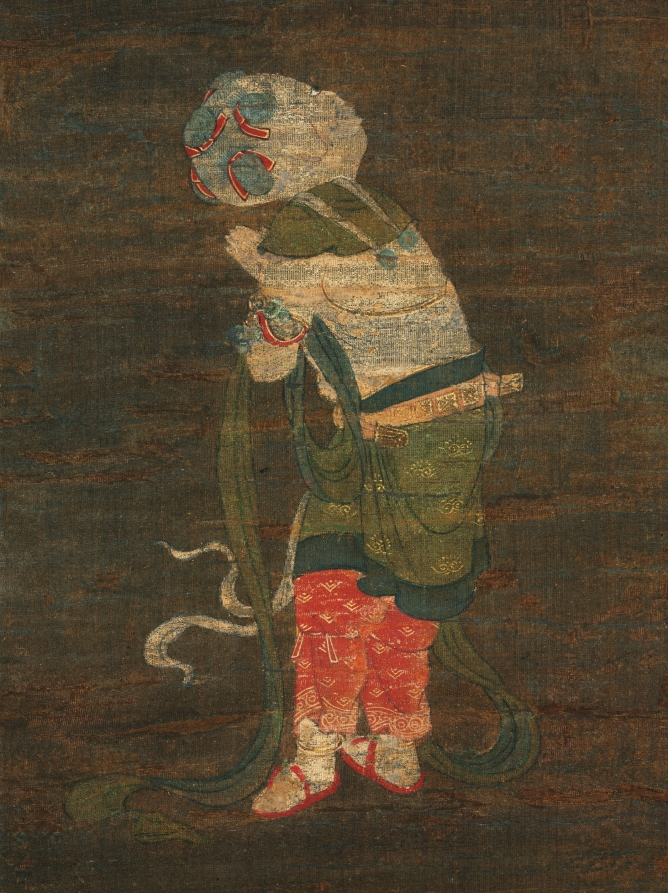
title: Shakyamuni Triad: Buddha Attended by Manjushri and Samantabhadra (Bodhisattva with Lion)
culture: China, Fuzhou, Fujian Province, Yuan dynasty (1271-1368)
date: late 1300s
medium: Hanging scroll; ink and color on silk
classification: Painting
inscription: Inscription at the bottom of the central scroll reads: "Da Song Fuzhou fu…(Fuzhou prefecture of the great Song)."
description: This triptych is a rare example of Yuan Buddhist painting. It depicts the historic Buddha Shakyamuni flanked by two attending bodhisattvas, Manjushri (the bodhisattva of wisdom, riding a lion) and Samantabhadra (the bodhisattva of universal virtue, riding an elephant). Below them are others seeking enlightenment: two disciples of the Buddha (Ananada and Kasyapa), two non-Chinese people, a boy with topknots, and a female worshiper. The clouds above and around the divine beings form one scene that illustrates Shakyamuni’s sermon from the Lotus Sutra. This text became an important basis for Buddhist faith throughout East Asia and was central to the Mahayana school of Buddhism.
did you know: Manjushri, the bodhisattva of wisdom, leads the child Sudhana on his quest for enlightenment.